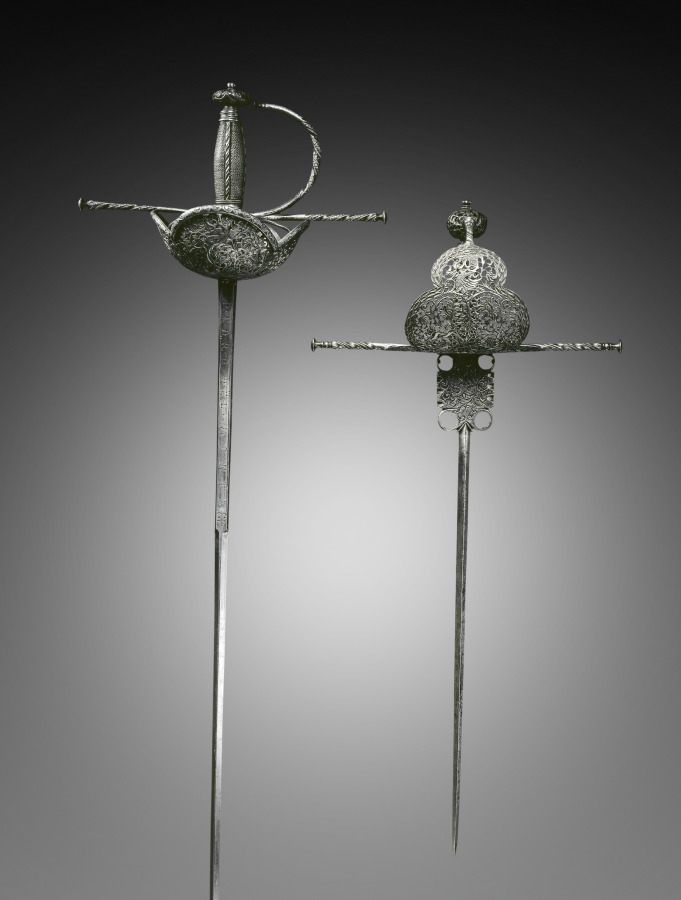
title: Cup-Hilted Rapier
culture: Spain, Toledo, 17th century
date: c. 1650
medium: Pierced and chiseled steel;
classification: Arms and Armor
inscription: PEDRO DEL MONTE/ IN TOLEDO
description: For parrying, rapiers were often made with accompanying daggers as a matched set. The aristocracy's taste for rich and intricate styles of decoration led to extravagant gilding, chiseling, piercing, enameling, and silvering. The more costly or unusual these weapons appeared, the more they were desired by the clientele who commissioned them, not only for dueling but also as the ultimate accessory.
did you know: The guard is richly decorated with chiseled and pierced arabesques, an ornamental design consisting of intertwined flowing lines.